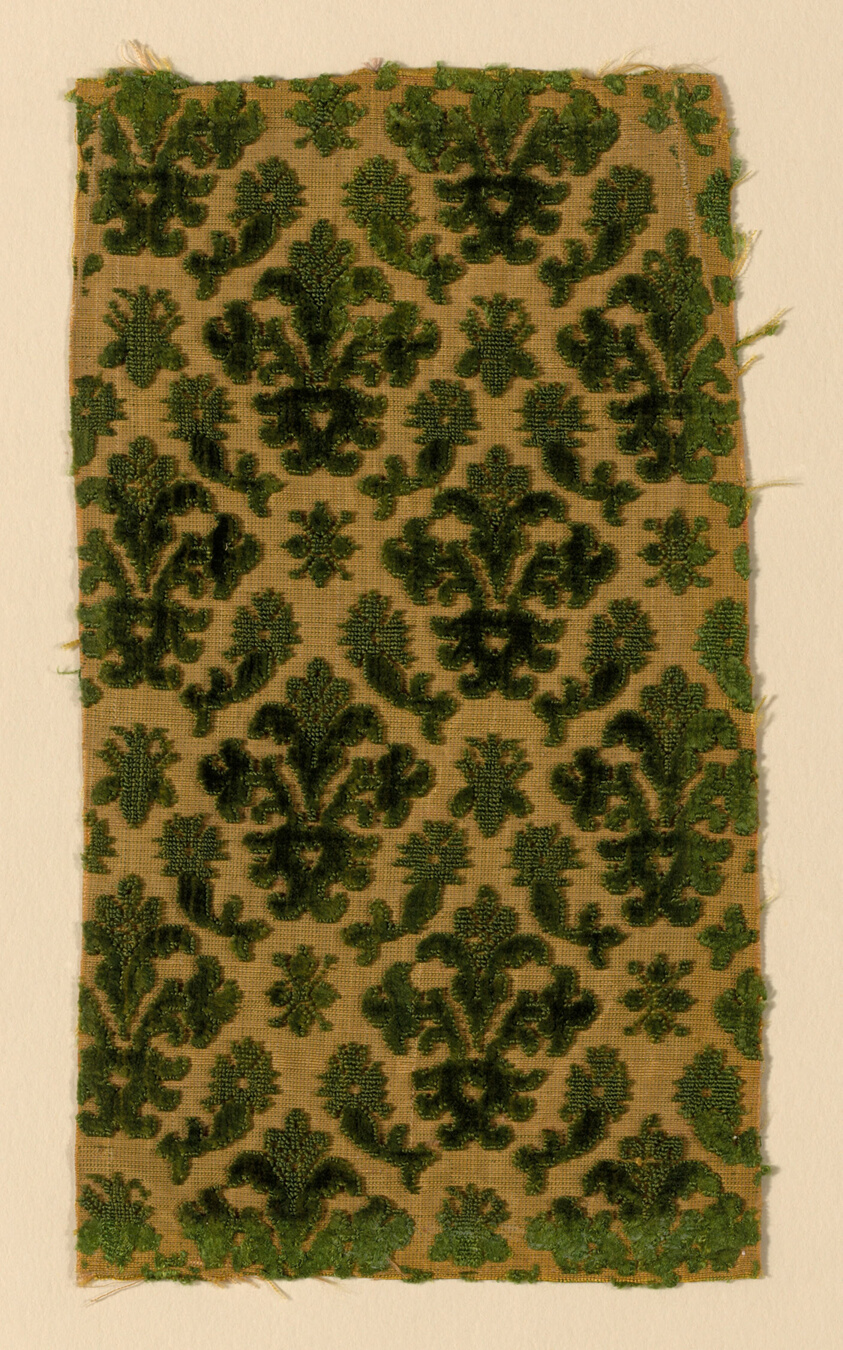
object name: Textile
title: Fragment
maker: Italy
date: c. 1600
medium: Silk, cut, uncut, and voided velvet aganst plain weave foundation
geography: Italy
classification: textile; weaving - velvet; weaving